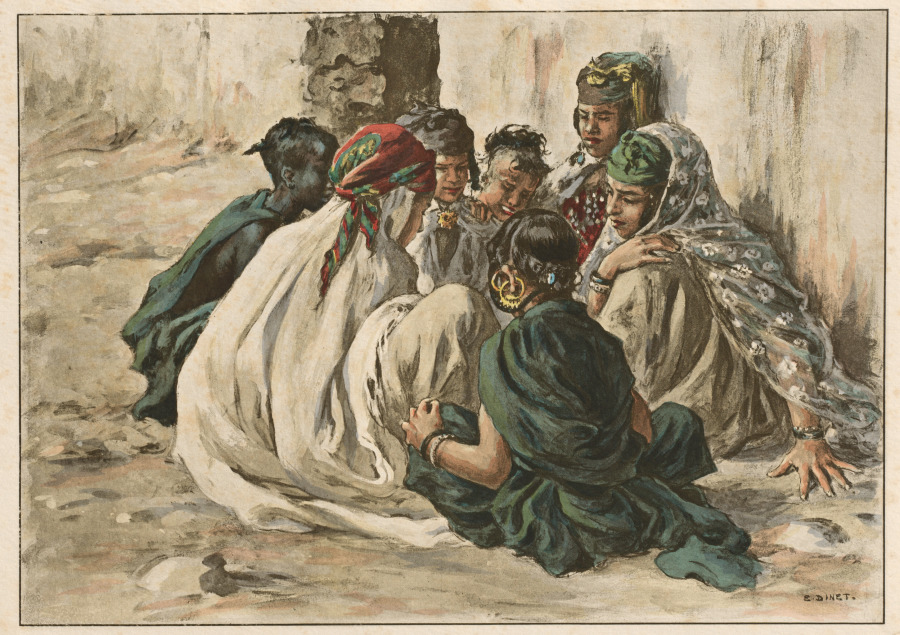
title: Jeux de Fillettes à Laghouat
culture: France, Paris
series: L'Estampe Moderne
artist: Étienne Dinet (French, 1861–1929)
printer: Imprimerie Champenois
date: 1899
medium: Color lithograph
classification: Bound Volume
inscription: In plate: lower right corner of image: E. DINET.; upper right corner of sheet: blindstamp of l'Estampe Moderne (Lugt 2790)